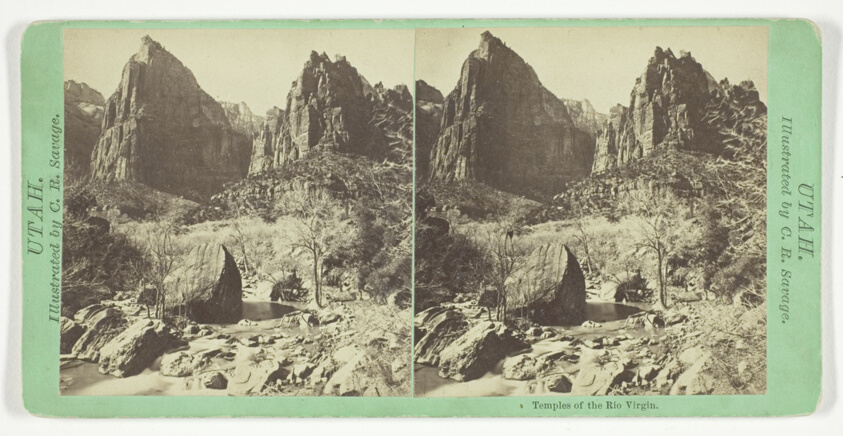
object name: Photograph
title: Temples of the Rio Virgin, from the series "Utah"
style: 19th century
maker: Charles Roscoe Savage (American, born England, 1832–1909)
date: 1859/62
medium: Albumen print, stereo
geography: United States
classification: stereograph (albumen); albumen silver print; photographic process; photography; photograph